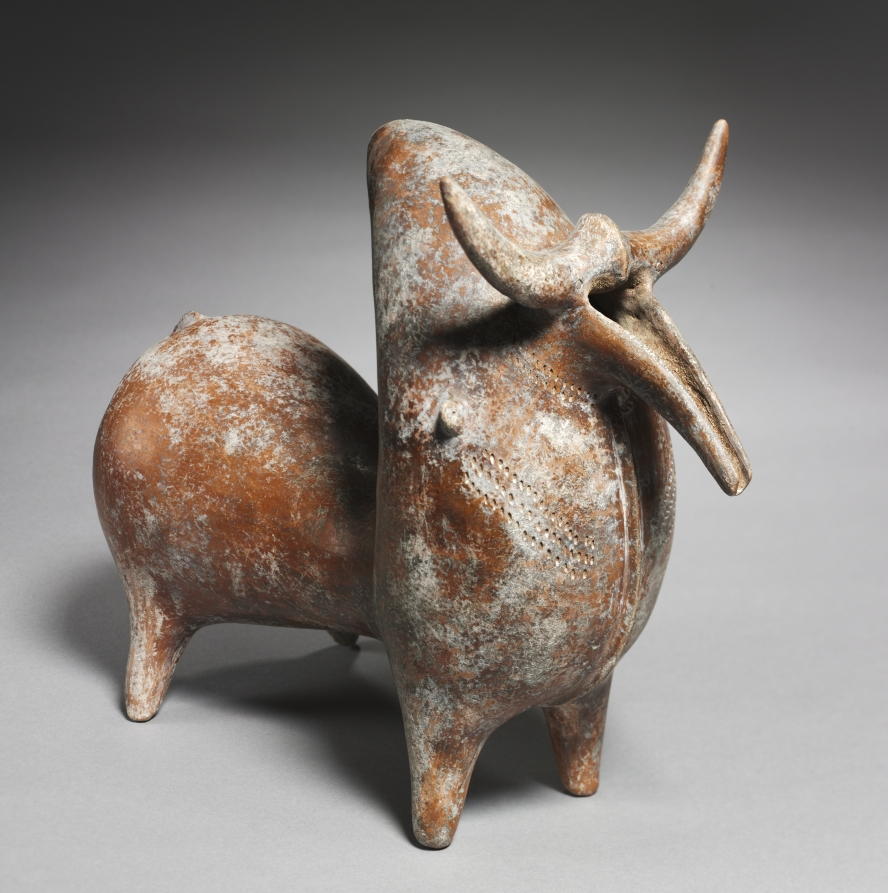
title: Spouted Zebu Vessel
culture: Iran, Marlik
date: c. 1000 BCE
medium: earthenware, burnished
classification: Ceramic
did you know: A zebu, sometimes known as humped cattle, is a species of domestic cattle originating in South Asia.